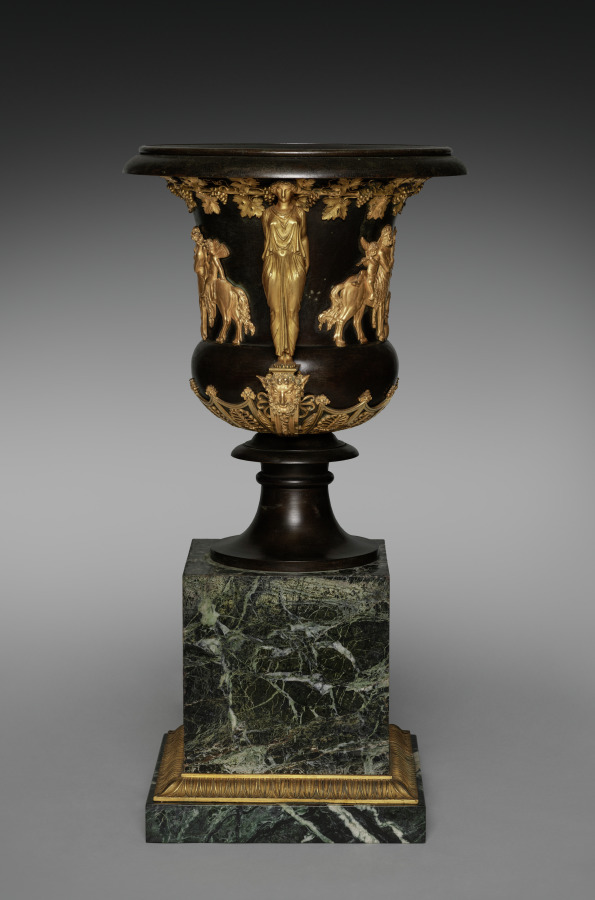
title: Vase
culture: France, late 18th-early 19th Century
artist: attributed to Pierre Philippe Thomire (French, 1751–1843)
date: c. 1800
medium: bronze, partially gilt, marble base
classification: Metalwork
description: In 1798, a large quantity of French furnishings was acquired for the Michael Palace in St. Petersburg, Russia. Some of these pieces survive in museums like the Hermitage Museum in St. Petersburg. This institution recently staged an exhibition of such French pieces by and attributed to Thomire. Among the objects shown was a bronze vase virtually identical in design to this piece. The body of this vase is decorated with two small reliefs showing male and female centaurs with putti riding on their backs. These reliefs also occur on silver wine coolers produced by the Odiot firm, a major Parisian silversmith under Napoleon's empire. The Odiot firm still owns models of these reliefs that, according to tradition, had been given to Jean-Baptiste Claude Odiot by Thomire.